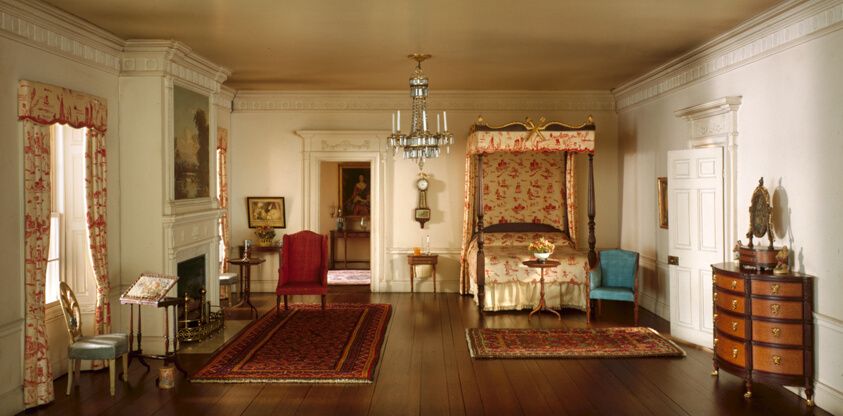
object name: Miniature room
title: A8: Massachusetts Bedroom, c. 1801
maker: Designed by Narcissa Niblack Thorne; American, 1882-1966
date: c. 1940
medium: Miniature room, mixed media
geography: United States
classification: miniature; thorne rooms